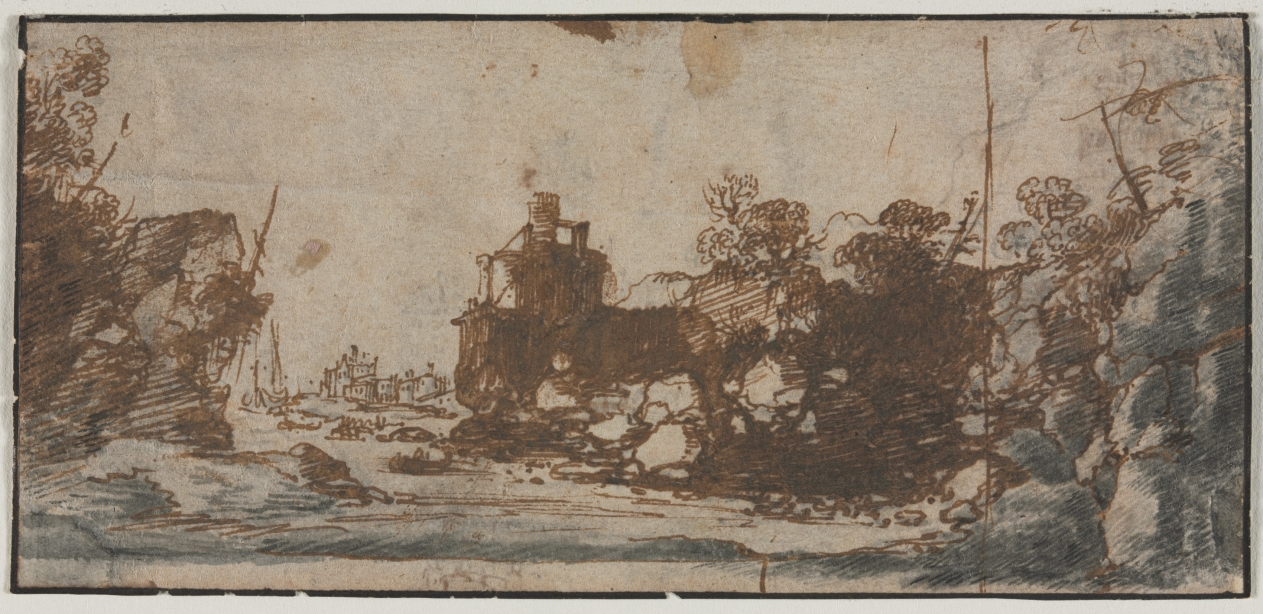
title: Rocky Inlet with Boats and Buildings (recto)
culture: Netherlands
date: 1600s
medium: pen and brown ink, point of brush and black and gray wash, and brush and gray wash over traces of graphite; framing lines in brown ink (iron gall)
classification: Drawing